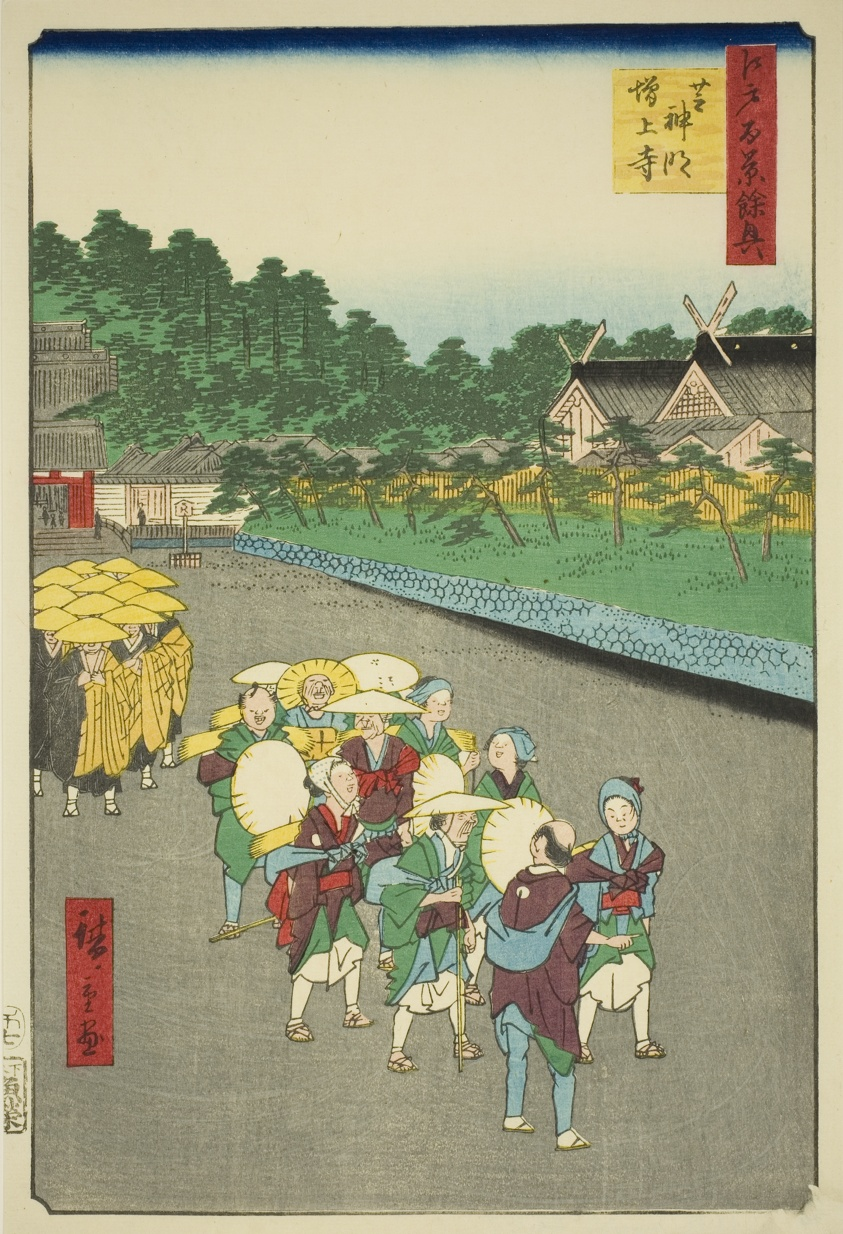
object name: Print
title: Shiba Shinmei Shrine and Zojoji Temple (Shiba Shinmei Zojoji), from the series "Supplement to the One Hundred Famous Views of Edo (Edo hyakkei yokyo)"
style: Japanese (culture or style)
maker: Utagawa Hiroshige 歌川 広重; Japanese, 1797-1858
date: 1858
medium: Color woodblock print; oban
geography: Japan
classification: woodblock print; print; asian art